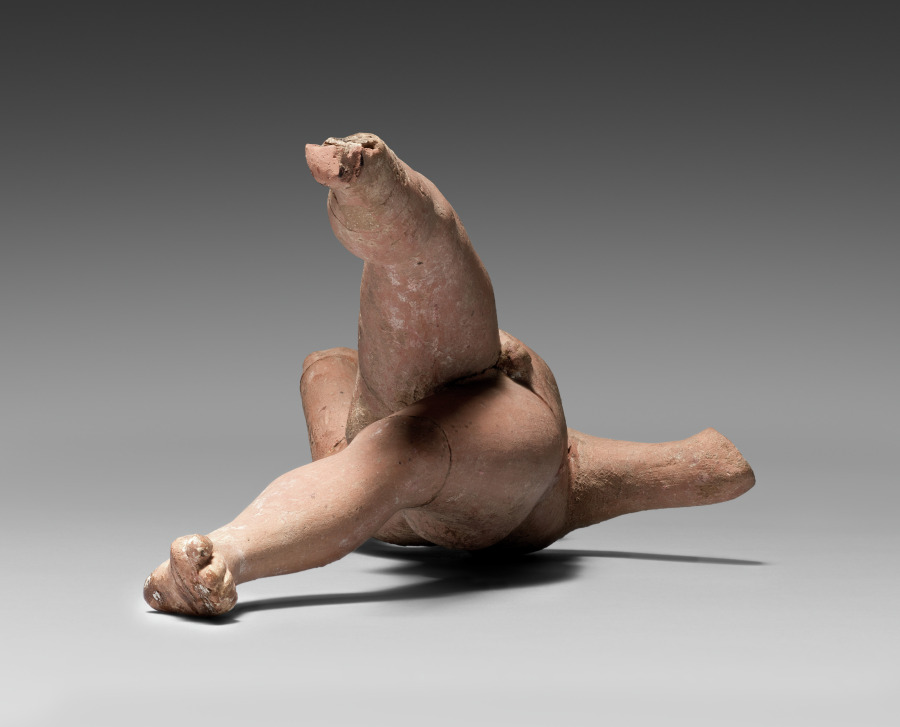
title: Dancing Eros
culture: Anatolia, Myrina, Greece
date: 300–200 BCE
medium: terracotta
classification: Sculpture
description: The region of Myrina in Asia Minor (now part of modern Turkey) is known for its abundance of ancient terracotta figurines. Eros, the Greek god of love, was especially popular. Here he is depicted as a nude youth, not a small child. Eros’ extra-long legs and arms, though only partially preserved, are thrown about in a carefree dance. He wears a celebratory floral crown atop his long curls. Once probably fully painted, only traces of red pigment survive on the face. A figurine like this one may have been a votive or offering of thanks to Eros or Aphrodite, his mother, also a goddess of love, for a successful marriage.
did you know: Figurines of Eros are often paired with figurines of his mythological wife, Psyche.